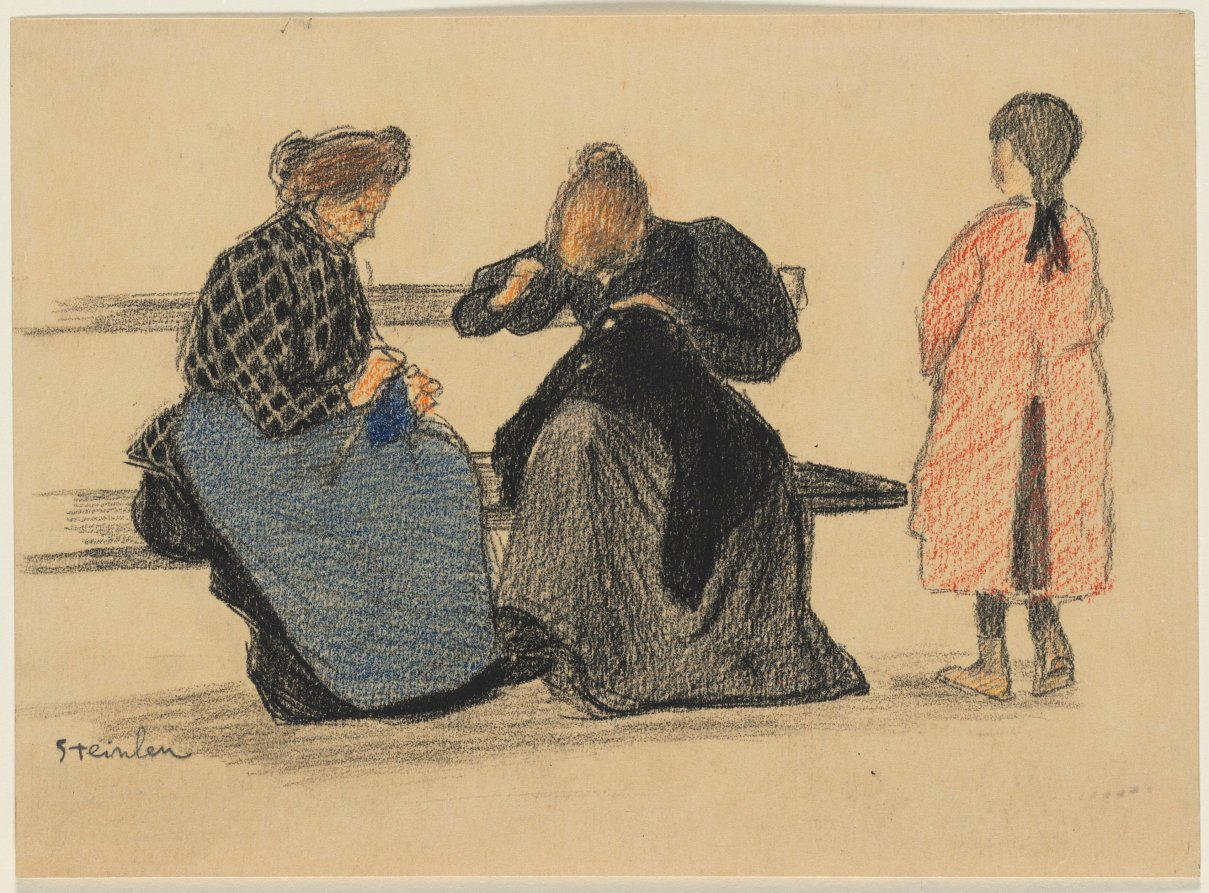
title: Three Figures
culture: France, 19th century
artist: Théophile Alexandre Steinlen (Swiss, 1859–1923)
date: 1900s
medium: black and colored crayons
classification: Drawing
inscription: Signed in graphite, lower left: Steinlen; verso, in pencil, right center margin: 437; lower right, collector's stamp in black: "JC" encircled.